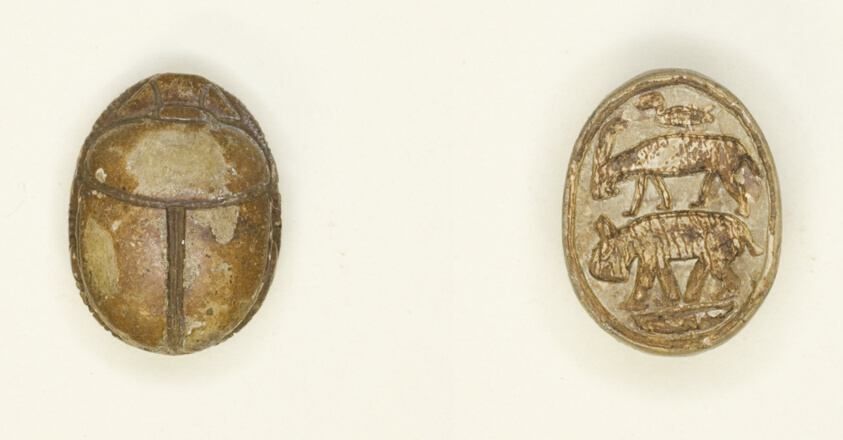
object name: Costume and Accessories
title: Scarab: Animal Motifs (Bird, Antelope, Hippopotamus)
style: new kingdom, egyptian, ancient, nineteenth dynasty, ramesside period, twentieth dynasty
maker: Egyptian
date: New Kingdom, Dynasties 19–20 (about 1295–1069 BCE)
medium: Steatite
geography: Egypt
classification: scarab; ancient art; costume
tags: scarab beetle, animals, antelope, bird, Hippopotamus